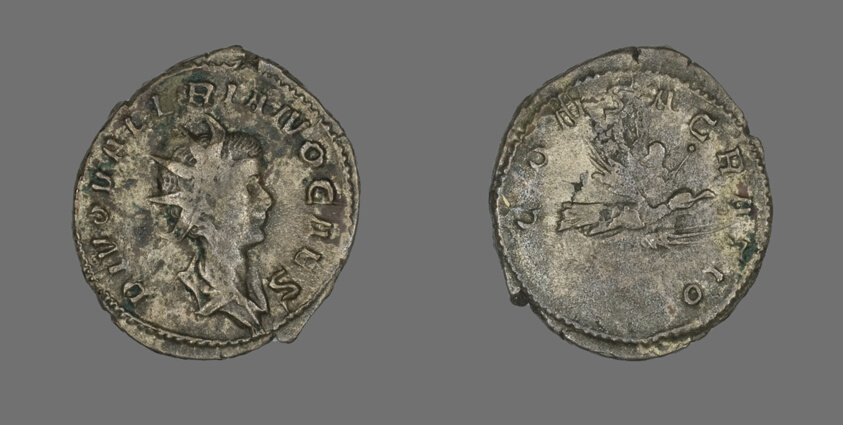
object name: Coin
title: Antoninianus (Coin) Portraying Emperor Valerian II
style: roman (ancient, style or period), ancient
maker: Roman, minted in Lyons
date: 259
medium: Billon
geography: Roman Empire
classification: coin; ancient art